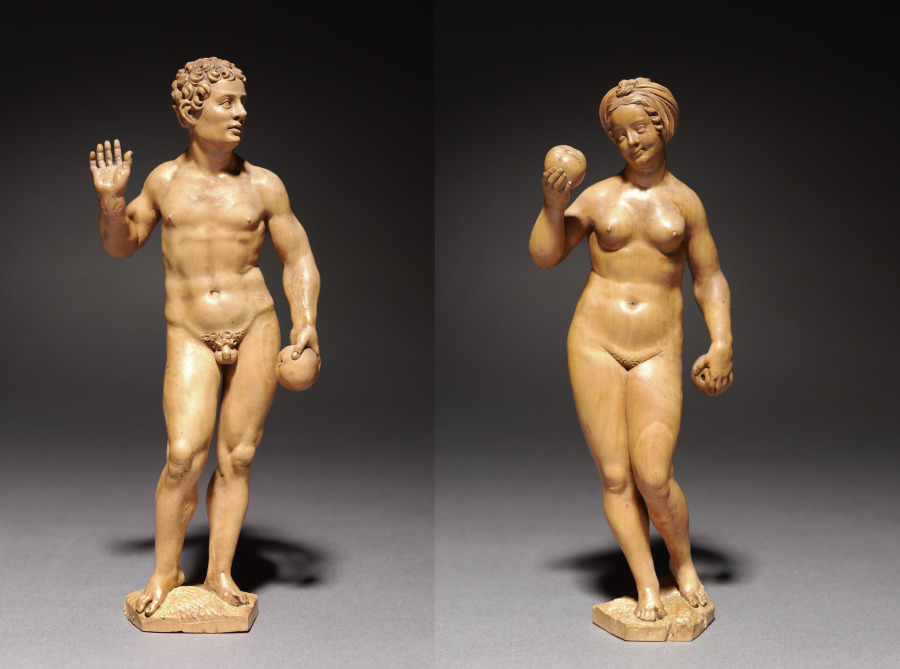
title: Adam and Eve (pair of statuettes)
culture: Germany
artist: Daniel Mauch (German, 1477–1540)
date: c. 1535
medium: boxwood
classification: Sculpture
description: Mauch straddled the late medieval and Renaissance traditions in his career. These small-scale statuettes, however, each made from a single piece of boxwood, stem from the most progressive strands of Renaissance art in southern Germany, closely connected to developments in both Italian and German bronze sculpture. The bodies reveal Mauch's careful study of human anatomy as well as a rapport with Albrecht Dürer's well-known print of the same subject.